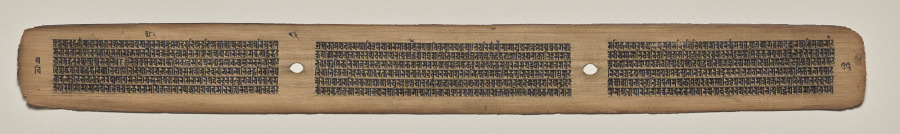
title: Text, Folio 23 (verso), from a Manuscript of the Perfection of Wisdom in Eight Thousand Lines (Ashtasahasrika Prajnaparamita-sutra)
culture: Eastern India, Bihar, Vikramashila Monastery. Painting: Nepal, Kathmandu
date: Sunday, September 14, 1119 (year 239 of the Newar Samvat in the month of Ashvina)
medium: gum tempera and ink on palm leaves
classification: Painting